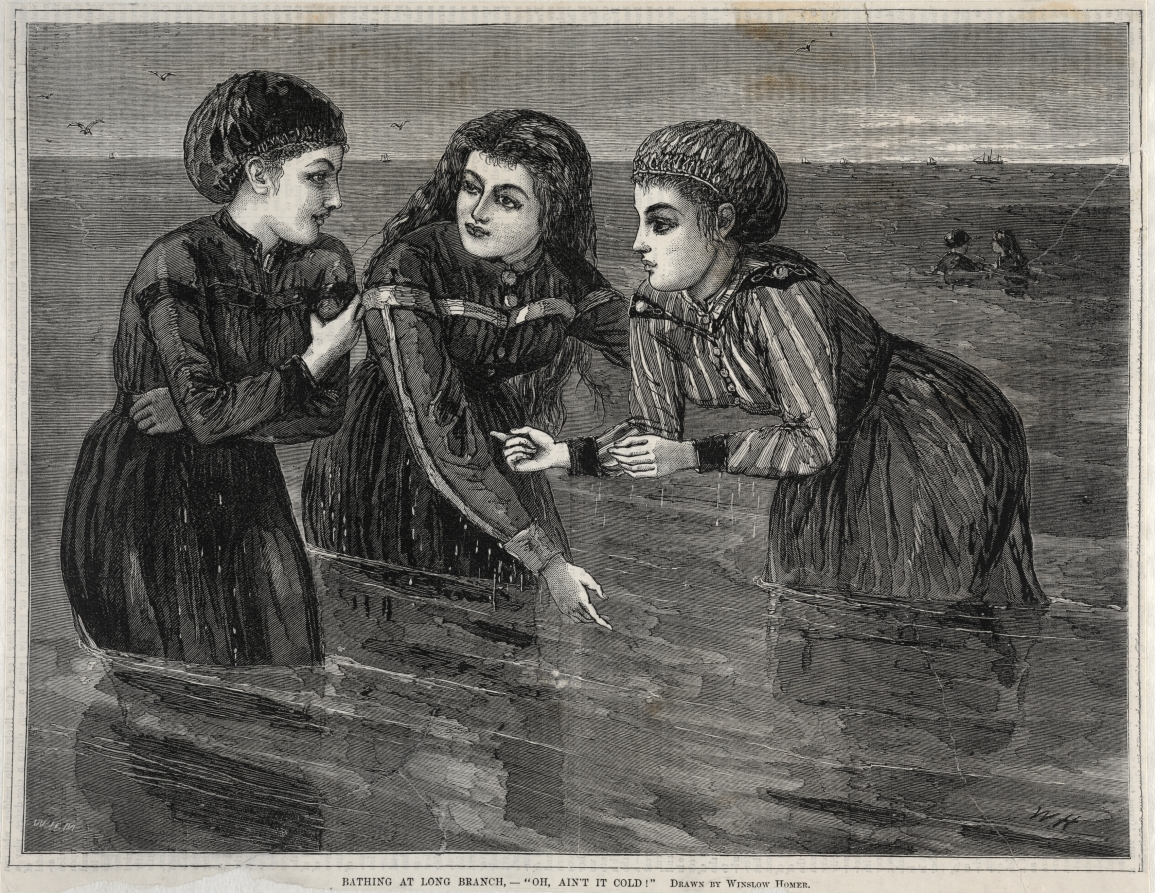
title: Bathing at Long Branch, - "Oh, Ain't it Cold!"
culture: America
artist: Winslow Homer (American, 1836–1910)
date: 1871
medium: wood engraving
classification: Print